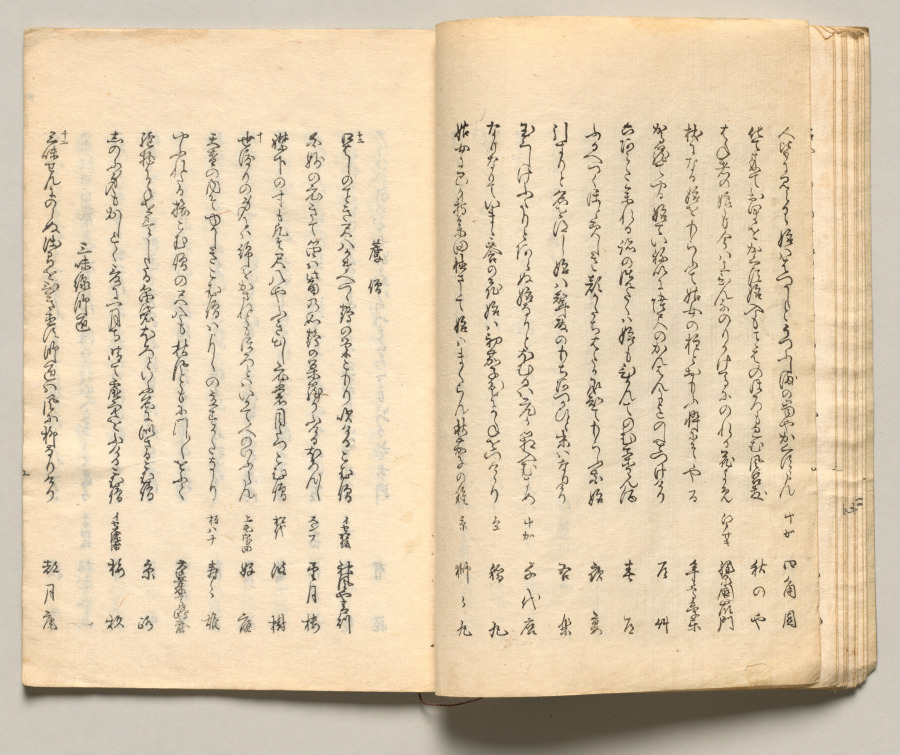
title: Spread Twelve from Volume Five of People of Japan in Light Verse (Kyōka)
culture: Japan, Edo period (1615–1868)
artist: Utagawa Hiroshige (Japanese, 1797–1858)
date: 1857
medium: Woodblock-printed book; ink and color on paper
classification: Bound Volume